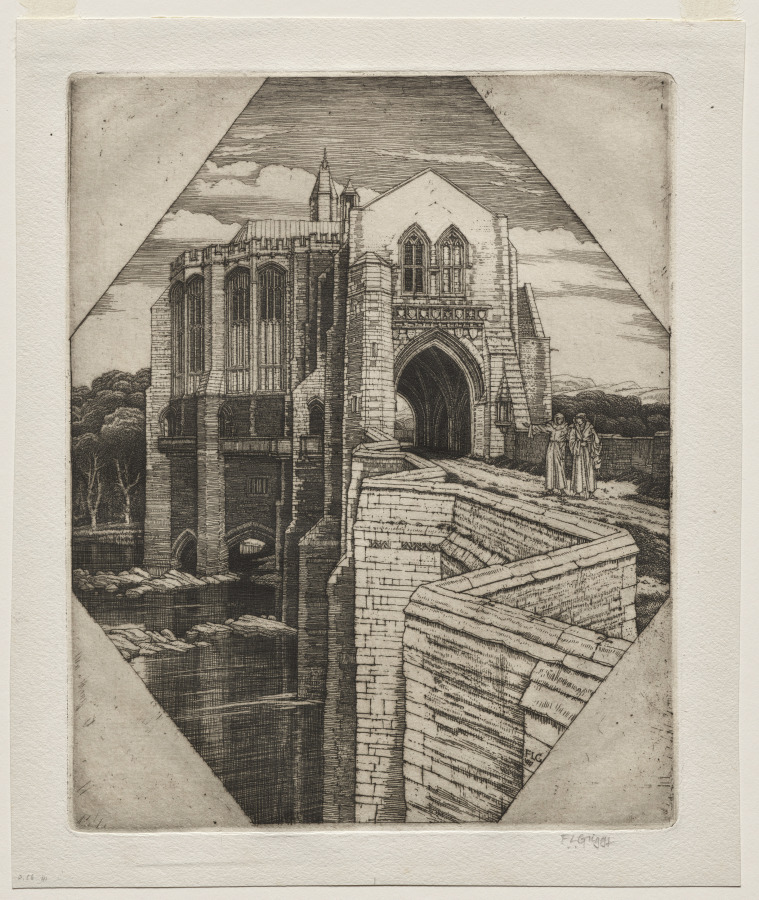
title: St. Botolph's Bridge No. 2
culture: England, 20th century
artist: Frederick Landseer Maur Griggs (British, 1876–1938)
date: 1937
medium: etching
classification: Print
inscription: inscribed in graphite below image: FLGriggs (l.r); inscribed in graphite in lower left corner of sheet: D.56 III; inscribed in plate: FLG/ 1937 (l.r)